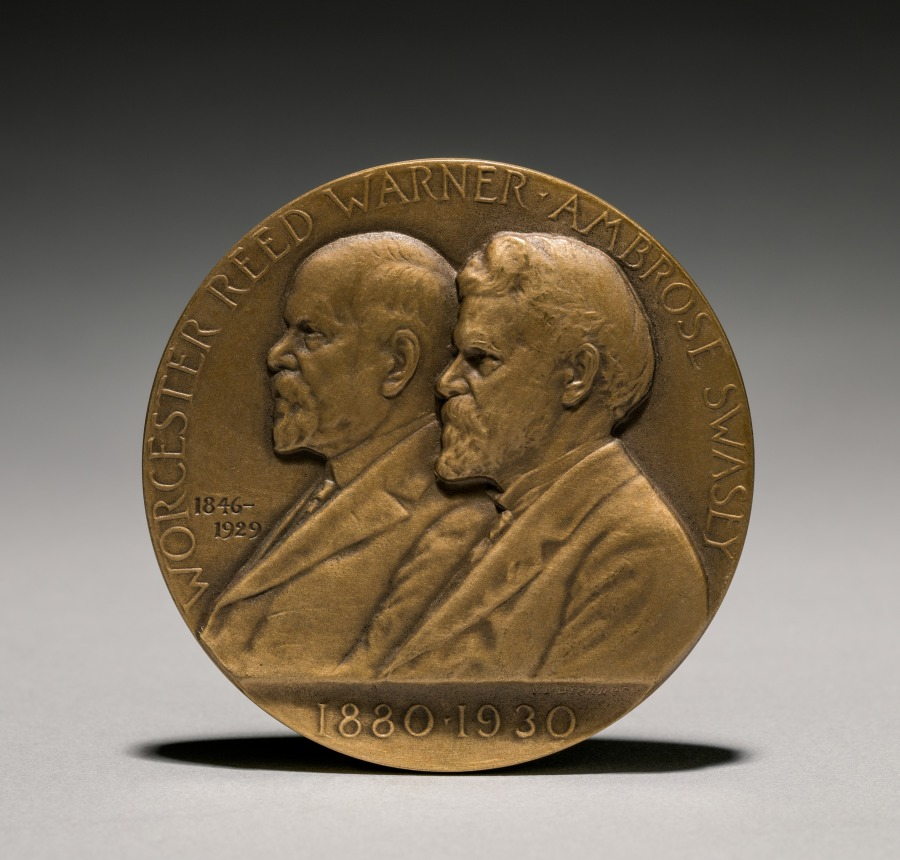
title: Medal: In Commemoration of the Fiftieth Anniversary - The Warner and Swasey Company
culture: America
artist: Victor D. Brenner (American, 1871–1924)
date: 1930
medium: bronze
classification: Metalwork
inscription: obverse - encircling the busts: "WORCESTER REED WARNER . AMBROSE SWASEY"; center below: "1880-1920"; at left beside bust of Worcester R. Warner: "1846-1929"; under bust at right: "V. D. BRENNER." reverse - center bottom: "LICK TELESCOPE"; left: "THE WARNER & SWASEY CO."; right: "CLEVELAND, OHIO, U. S. A.